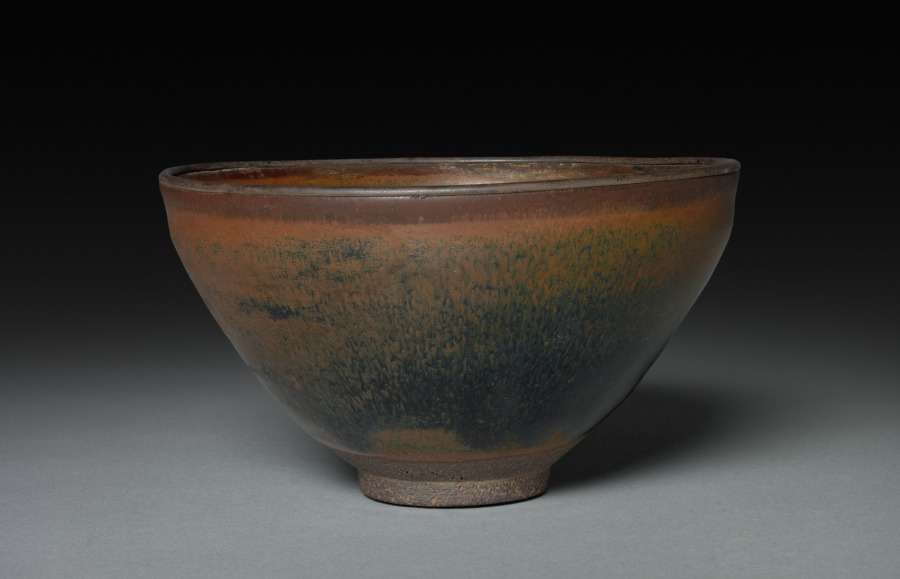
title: Tea Bowl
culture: China, Fujian province, Song dynasty (960-1279)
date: 960–1279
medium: purplish brown stoneware with iron slip glaze coating, Jian ware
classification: Ceramic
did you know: Jian ware was very popular with the tea cultures in China and Japan.